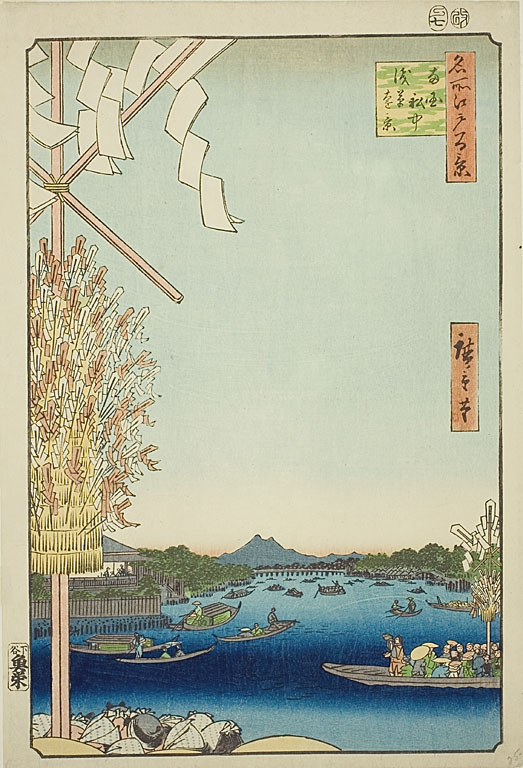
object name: Print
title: Asakusa River, Great Riverbank, Miyato River (Asakusagawa Okawabata Miyatogawa), No.60 from the series “One Hundred Famous Views of Edo (Meisho Edo hyakkei)”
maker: Utagawa Hiroshige (Japanese, 1797-1858)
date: 1857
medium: Color woodblock print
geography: Japan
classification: woodblock print; print; asian art